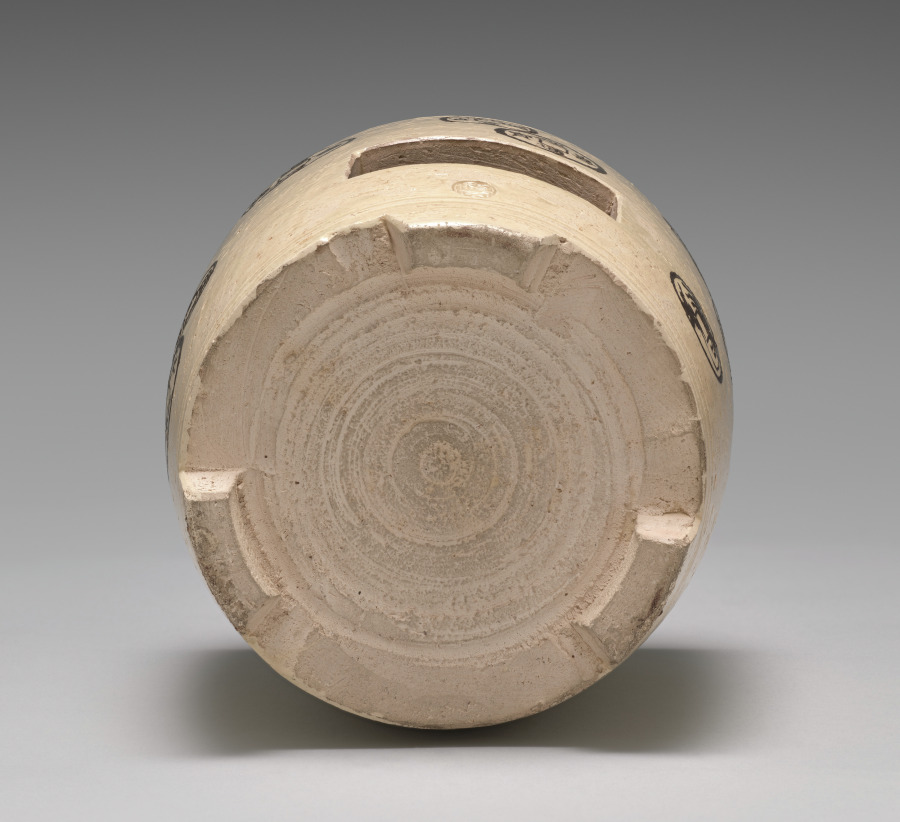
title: Brazier with Coins Motif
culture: Japan, Meiji period (1868–1912)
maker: Seifū Yohei III (Japanese, 1851–1914)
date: 1893–1914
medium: Stoneware with underglaze iron oxide designs and crackling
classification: Ceramic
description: Tall pottery braziers called ryōro are often used to heat the water for the tea served at sencha gatherings. This one sits on three sturdy legs, one of which bears the artist’s seal on its face. A horizontal rectilinear opening above this leg allows air to circulate into the lower part of the brazier. The top part is outfitted with three prongs onto which the kettle can be lowered; below them is a basin, perforated with circular holes, that holds the charcoal fuel. The brazier is decorated under the crackled transparent glaze with a design of old coins in iron oxide. The motif is cleverly chosen, for most older coins are round with a central hole, often square, which echoes the cylindrical form of the brazier with its rectilinear “wind gate,” or fūmon.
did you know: One coin is painted with the Japanese god of wealth, Daikokuten, standing upon two bales of rice.